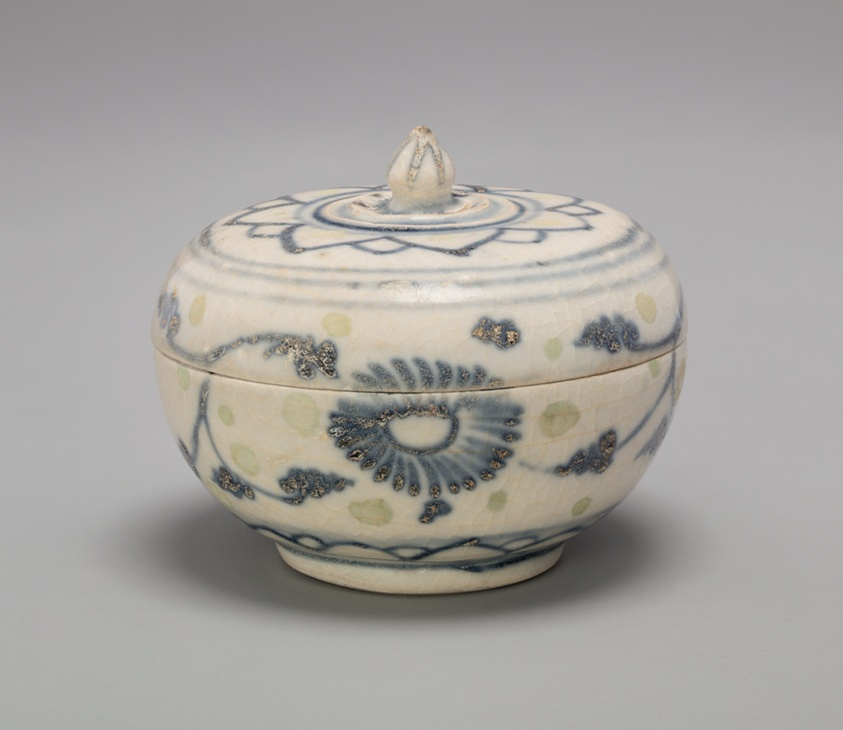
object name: Ceramics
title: Covered Box with Lotus Bud Knob and Lotus Flower Motif on Lid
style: annamese, vietnamese, Southeast Asian, asian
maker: Vietnam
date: 15th century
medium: Glazed stoneware with cobalt-blue underglaze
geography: Vietnam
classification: ceramics; asian art